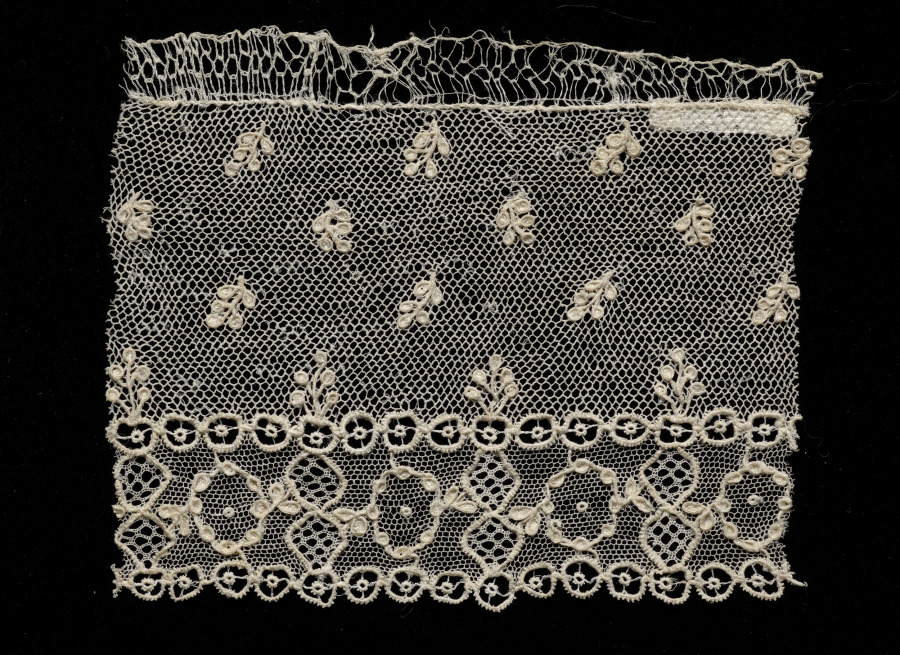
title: Lace Edging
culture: France, Alençon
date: 1700s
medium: Linen: needle lace (Point d'Alençon)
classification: Lace